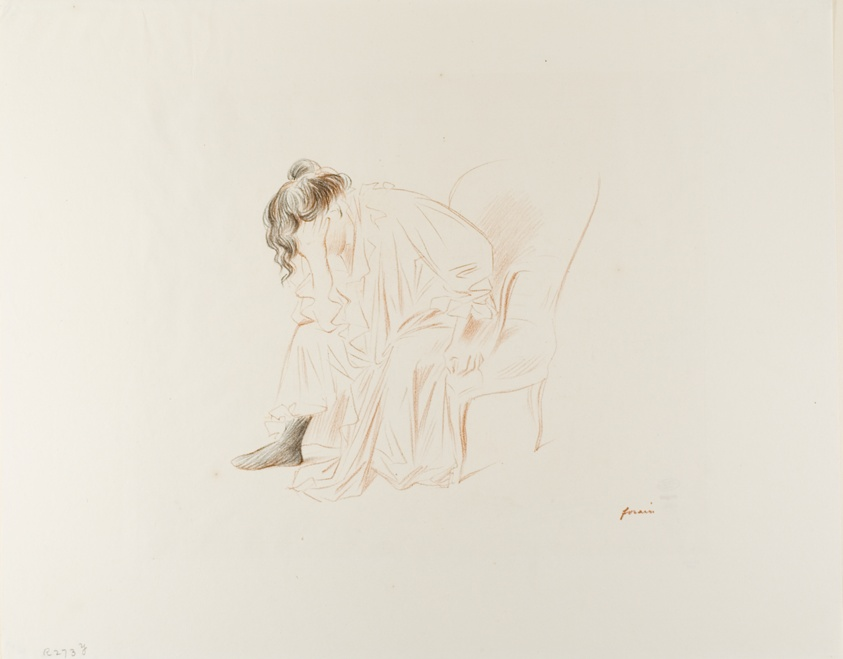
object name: Print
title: Seated Woman, Head in Right Hand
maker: Jean Louis Forain (French, 1852-1931)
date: 1897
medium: Lithograph in sanguine and black on ivory wove paper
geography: France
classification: lithograph; print; prints and drawing